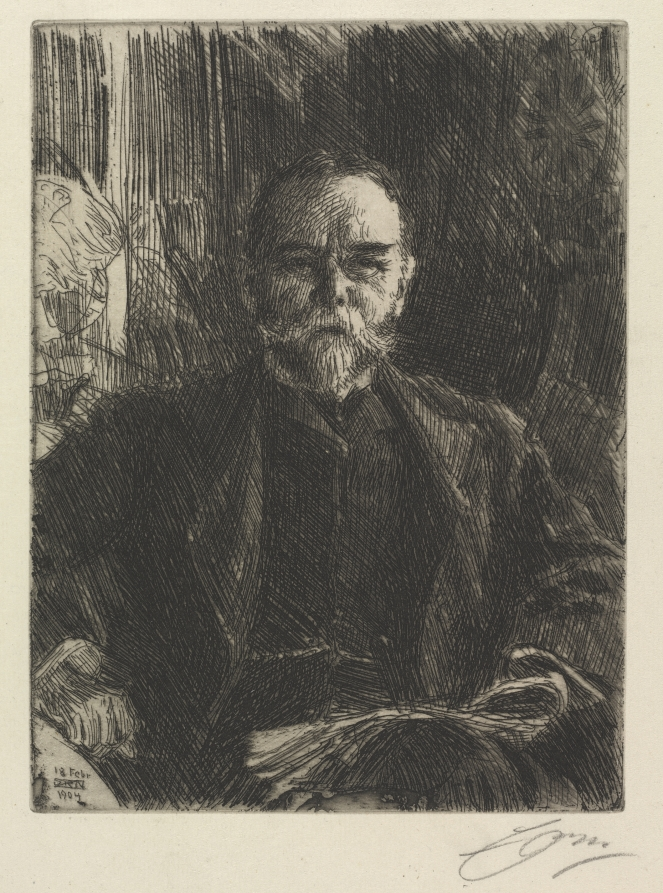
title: John Hay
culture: Sweden, early 20th Century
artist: Anders Zorn (Swedish, 1860–1920)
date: 1904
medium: etching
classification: Print